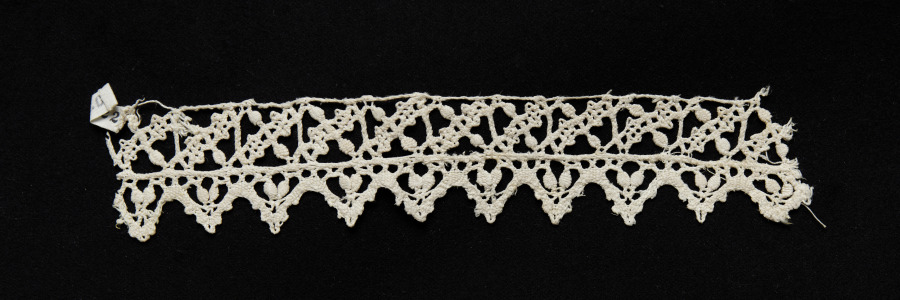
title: Lace Insertion with Edging of Points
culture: Italy, Genoa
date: 1550–99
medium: Bobbin lace (needle lace, reticella design)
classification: Lace